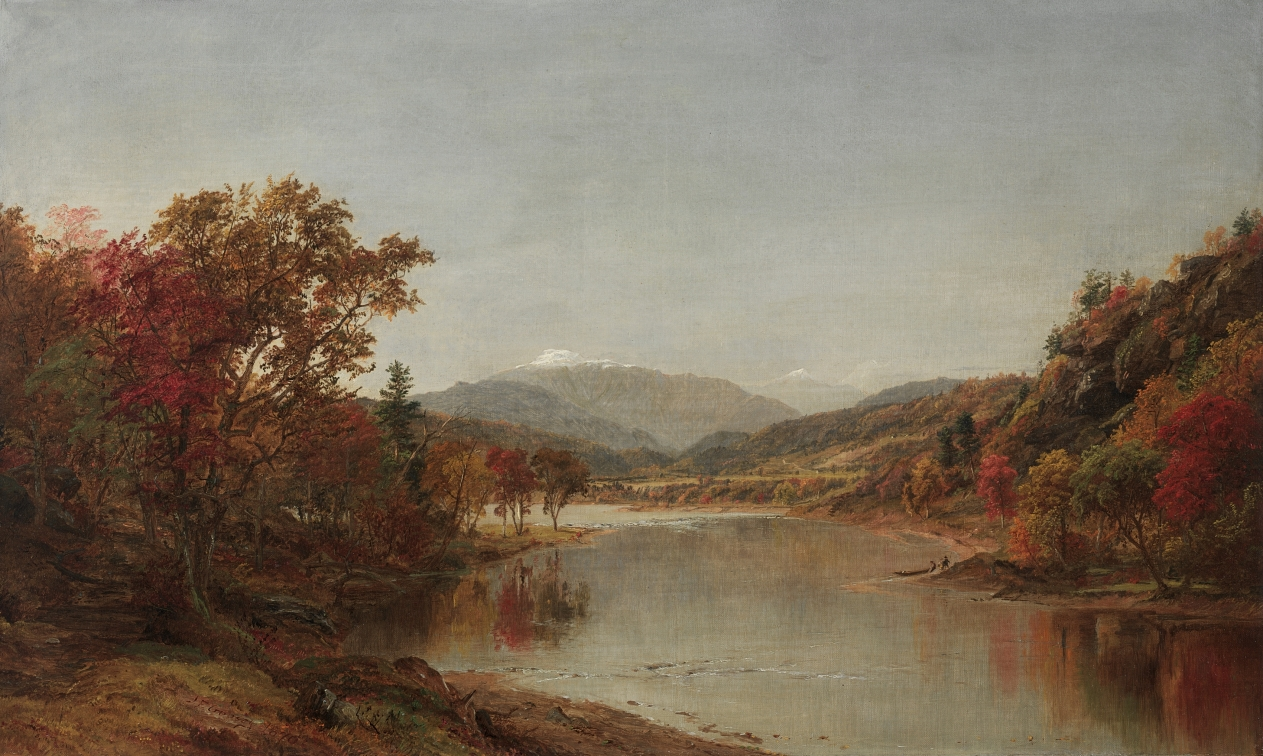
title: Mount Washington, New Hampshire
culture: America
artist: Jasper F. Cropsey (American, 1823–1900)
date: 1870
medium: oil on canvas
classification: Painting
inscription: Signed lower left: "J. F. Cropsey 1870"